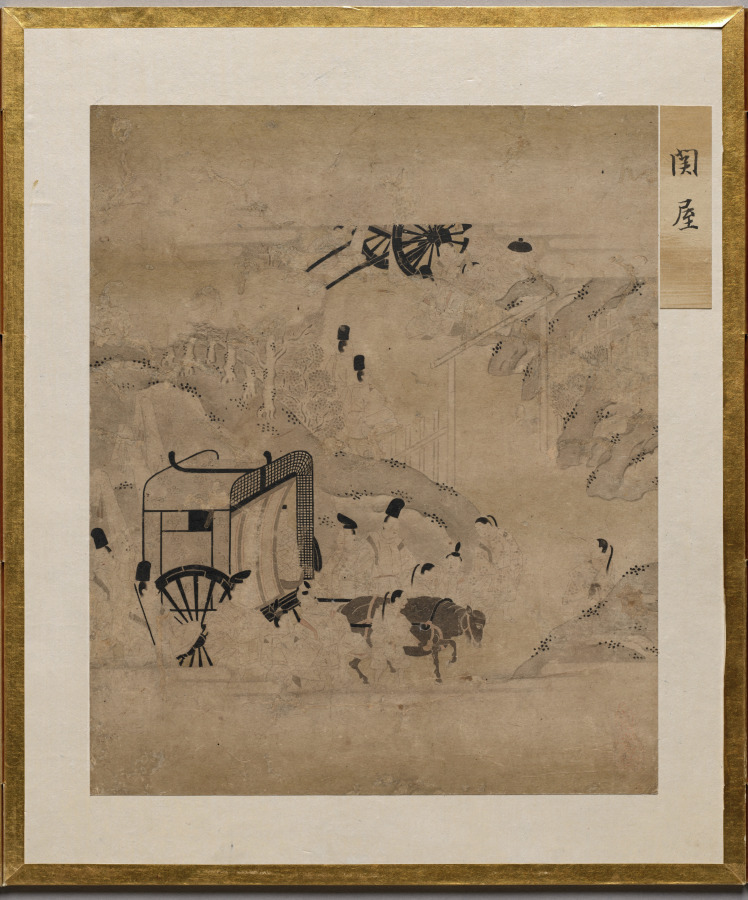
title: Gatehouse from Album of Illustrations for the Tale of Genji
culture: Japan, Edo period (1615–1868)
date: 1600s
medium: painting in an accordion-style album; ink, light color, and gold on paper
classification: Bound Volume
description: This album contains illustrations for the classic literary work the Tale of Genji, authored in the 1000s by Murasaki Shikibu, an aristocrat of the Heian period (794–1185) court. The scenes are painted in the “white drawing” (hakubyō) mode, in which a fine ink line is used to depict figures and spaces with great subtlety, punctuated only occasionally by traces of red pigment for a character’s lips, a detail of a garment, or a decorative element. These two scenes illustrate episodes from the chapters “Thin Veil of Cloud” (Usugumo) and “Barrier Gate” (Sekiya).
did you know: The illustrations are identified by chapter title in cartouches to the upper right of the paintings.